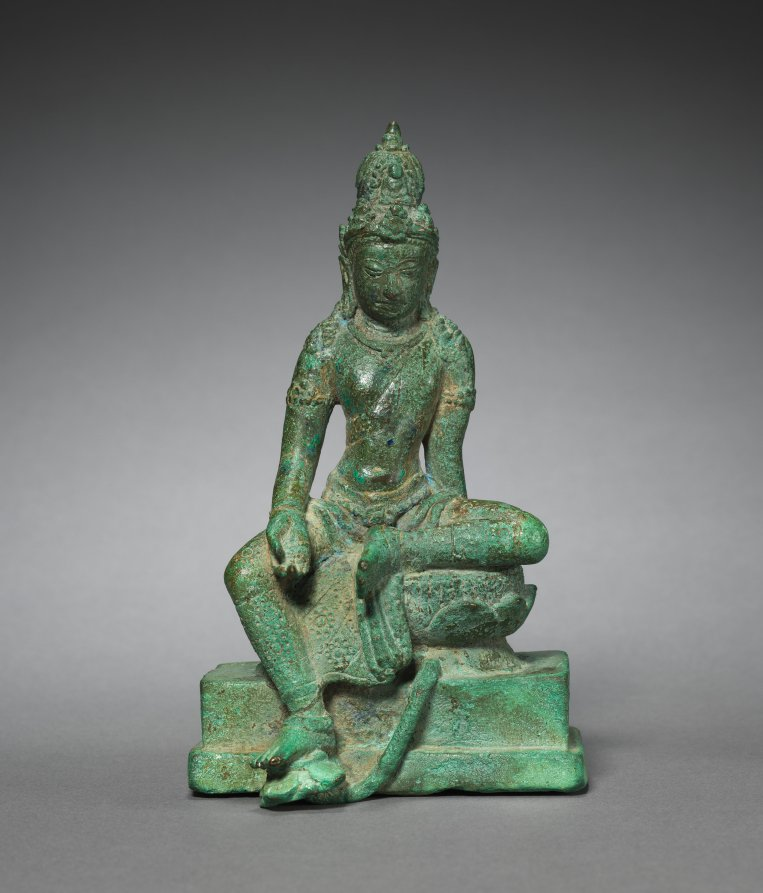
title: Avalokiteshvara (Bodhisattva of Mercy)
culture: Java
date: 800s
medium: bronze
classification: Sculpture